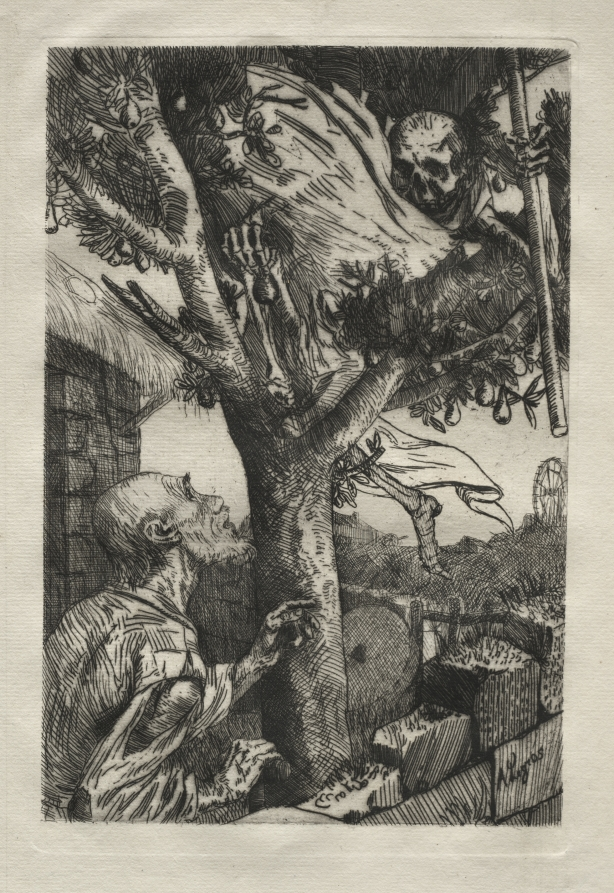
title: La mort dans le piorier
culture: France, 19th-20th century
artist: Alphonse Legros (French, 1837–1911)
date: c. 1869–74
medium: etching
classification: Print